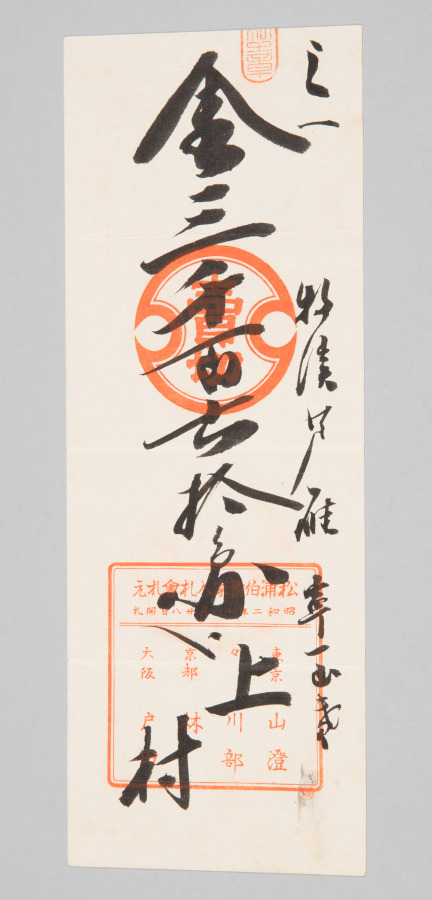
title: Reeds and Geese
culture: Japan, Kamakura period (1185–1333)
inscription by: Yishan Yining [Issan Ichinei] (Chinese, 1247–1317)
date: 1314–17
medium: hanging scroll; ink on paper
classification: Painting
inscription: signed: Issan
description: Reeds and geese has been a common pairing in Chinese literary and visual culture for many centuries. This painting presents the contribution of a Japanese amateur painter, almost certainly a Zen Buddhist monk, to Japan’s fledgling efforts to add the theme to its own cultural vocabulary in the early 1300s. As was customary at the time in Japan, the painter did not sign or seal his work; the inscription, a poem added to the painting by the eminent émigré monk Yishan Yining, along with his signature and seal, was of far greater cultural value. Today, the modestly sized painting has tremendous significance as one of the earliest surviving examples of Japanese ink paintings with reeds and geese.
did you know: Tokyo National Museum owns a copy of this painting made by Kano Gyokusen (1796–1864) when he was 14 years old.